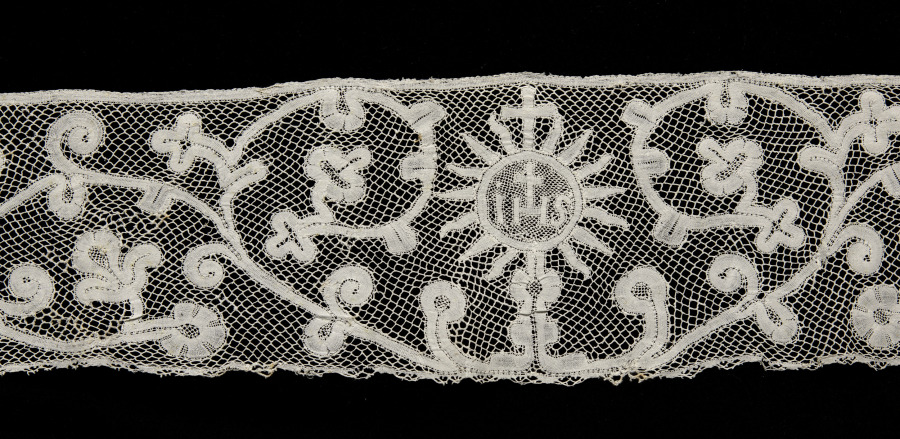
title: Lace Edging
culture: Italy, Milan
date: 1700s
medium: Linen: bobbin lace design on mesh ground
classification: Lace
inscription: "I H S."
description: The IHS symbol can be seen in this piece of lace. It is a monogram representing the first three letters of Jesus’s name in Greek: iota, eta, and sigma. It serves as a visual abbreviation of Jesus Christ and is often found on ecclesiastical textiles.